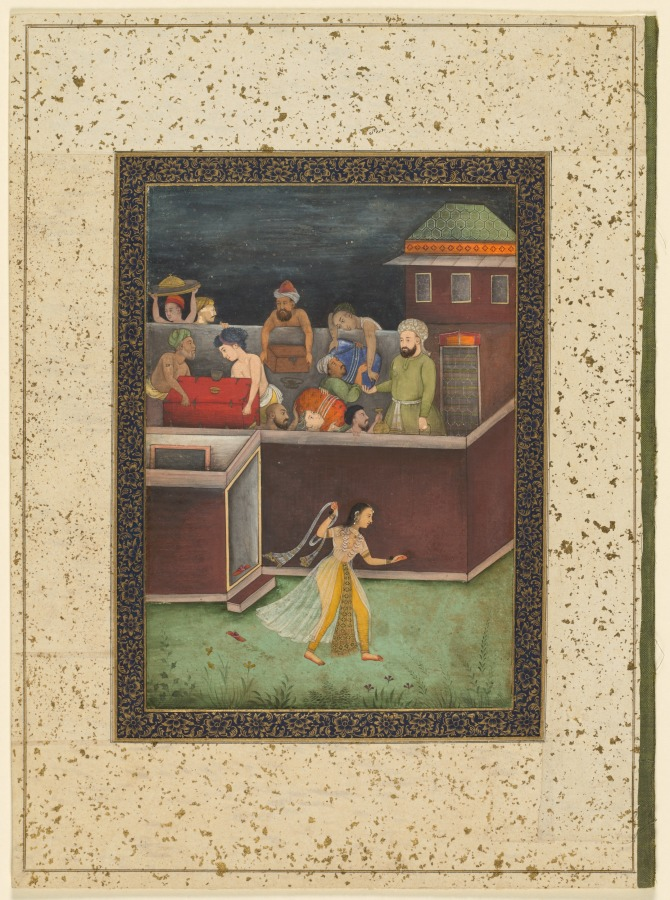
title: A House Burgled at Night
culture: Mughal India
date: c. 1700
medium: Gum tempera and gold on paper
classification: Painting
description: In this night scene a band of robbers have climbed over the walls of a Mughal house and, from a courtyard, are successfully carrying out the possessions of its owners while a lady flees through the door. The speed of her movement is expressed in the swinging motion of her diaphanous skirt and the scarf clutched in her hand, as well as by the shoes abandoned on the ground in her haste. This depiction of unruly behavior and its effects are perhaps an expression of the violent succession of emperors that threw the Mughal court into distress at the beginning of the 18th century.